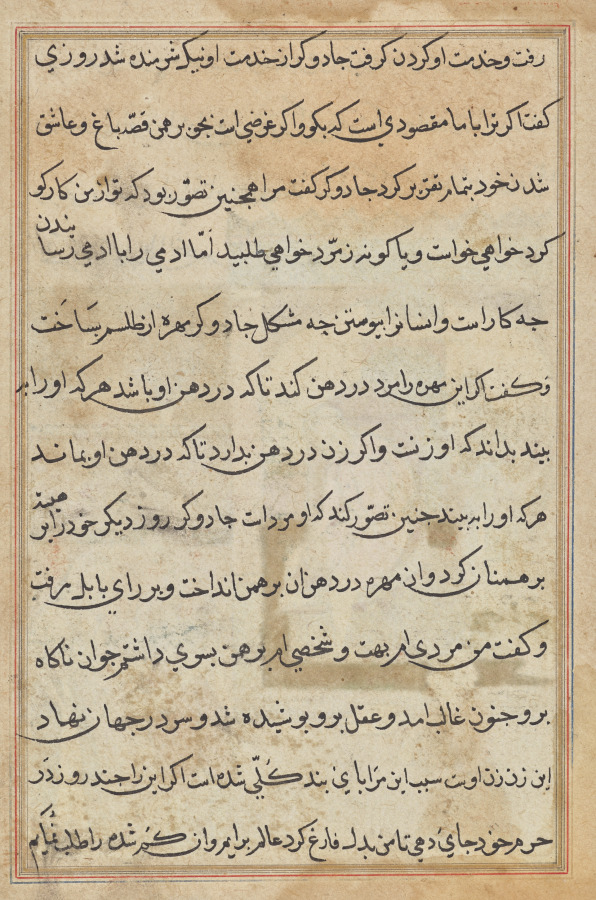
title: Page from Tales of a Parrot (Tuti-nama): text page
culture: Mughal India, court of Akbar (reigned 1556–1605)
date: c. 1560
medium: gum tempera, ink, and gold on paper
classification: Painting